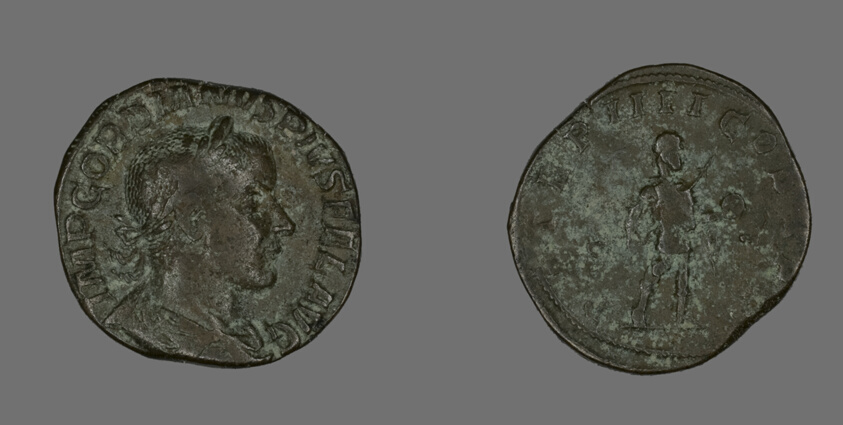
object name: Coin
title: Sestertius (Coin) Portraying Emperor Gordianus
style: roman (ancient, style or period), ancient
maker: Roman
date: 238-244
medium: Bronze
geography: Roman Empire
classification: coin; ancient art